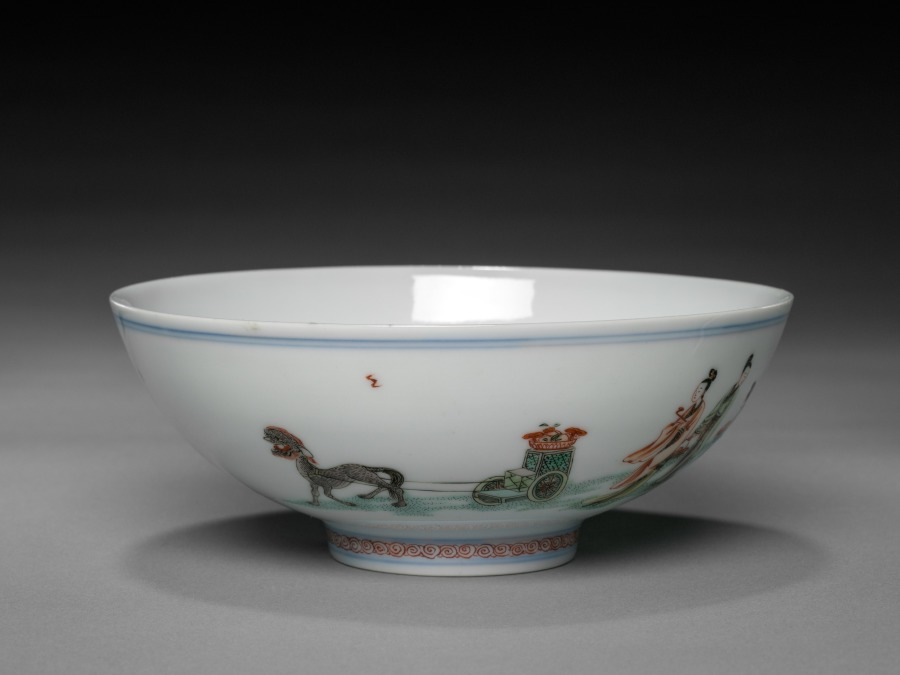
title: Bowl with Xiwangmu and Attendants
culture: China, Jiangxi province, Jingdezhen, Qing dynasty (1644-1911), Kangxi reign (1662-1722), but Chenghua mark (1465-87)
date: 1662–1722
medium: porcelain with famille verte overglaze enamel decoration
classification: Ceramic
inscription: 大明成化年製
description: Xiwangmu is the name for the Queen Mother of the West, an ancient Chinese goddess.